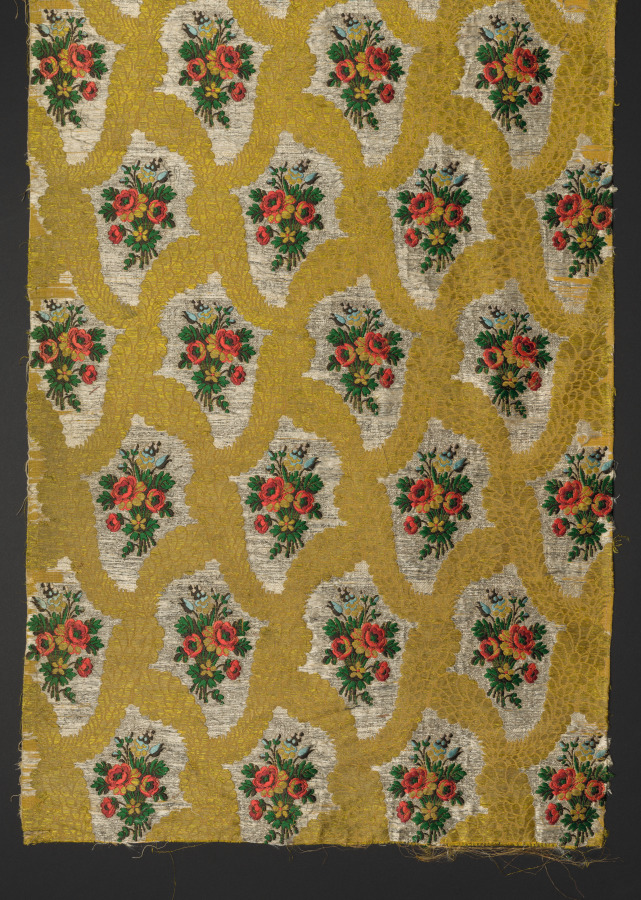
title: Coverlet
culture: Italy, 18th century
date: 1700s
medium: silk, metallic thread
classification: Textile